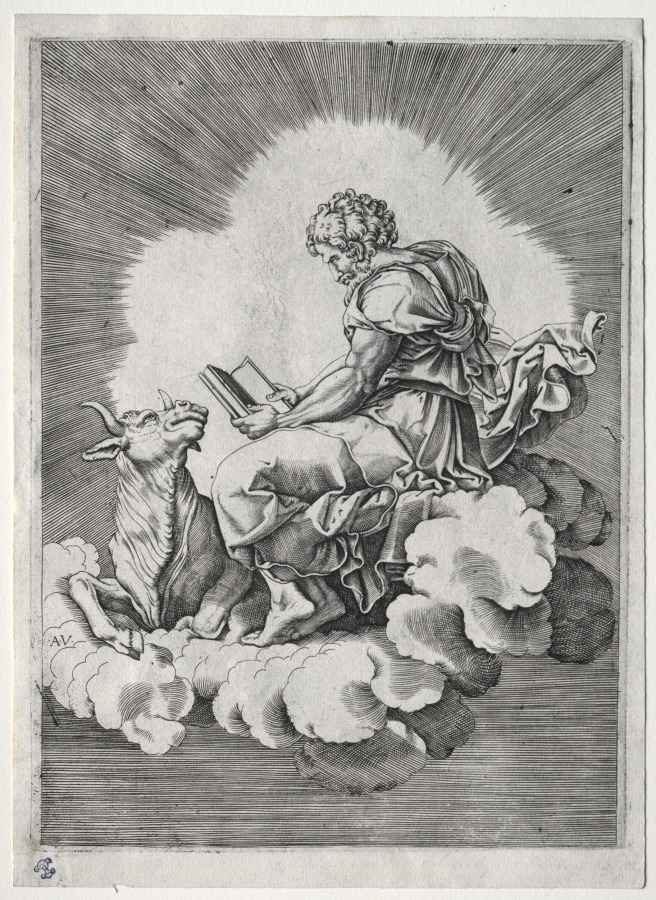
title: The Four Evangelists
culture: Italy, 16th century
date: c. 1518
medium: engraving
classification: Print